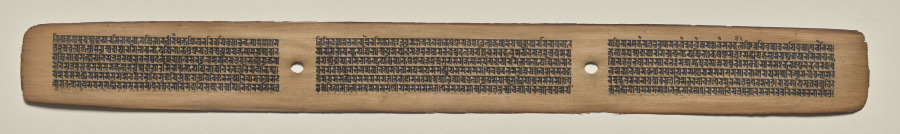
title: Text, Folio 98 (recto), from a Manuscript of the Perfection of Wisdom in Eight Thousand Lines (Ashtasahasrika Prajnaparamita-sutra)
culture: Eastern India, Bihar, Vikramashila Monastery. Painting: Nepal, Kathmandu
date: Sunday, September 14, 1119 (year 239 of the Newar Samvat in the month of Ashvina)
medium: gum tempera and ink on palm leaves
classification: Painting